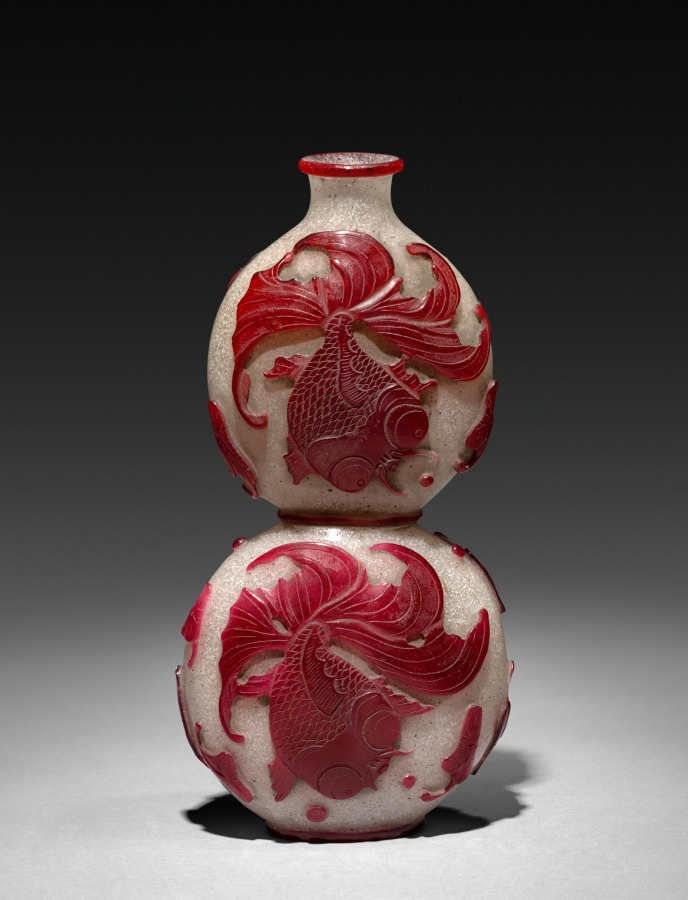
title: Gourd-Shaped Bottle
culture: China, Qing dynasty (1644-1911)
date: 1644–1911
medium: glass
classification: Glass